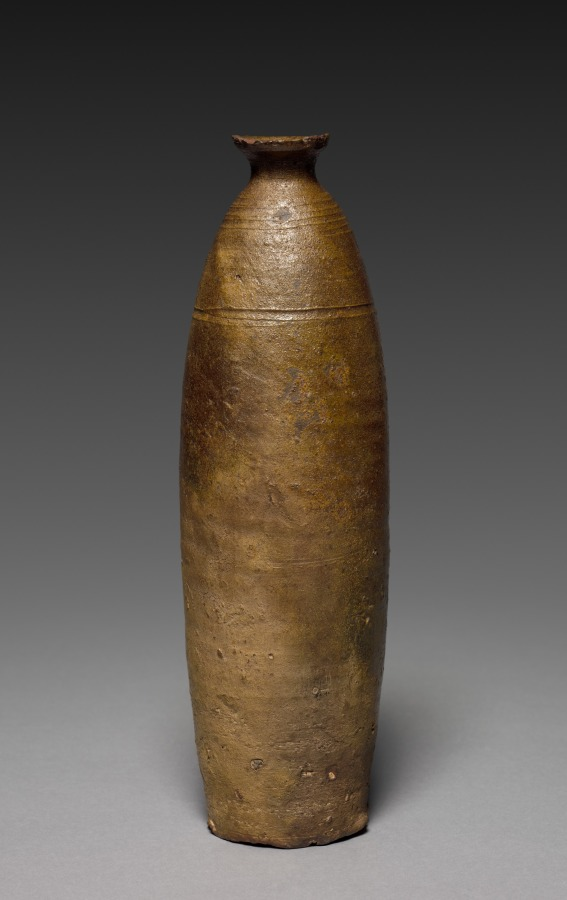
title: Sake Bottle: Ryukyu Namban Ware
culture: Japan, Edo period (1615–1868)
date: 1700s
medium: Ryukyu Namban Ware: stoneware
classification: Ceramic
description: Note the rich color gradations over the body that range from a deep brown to olive to ochre to a rust-red. The incised and gouged markings on the bottle contribute to its rustic texture.